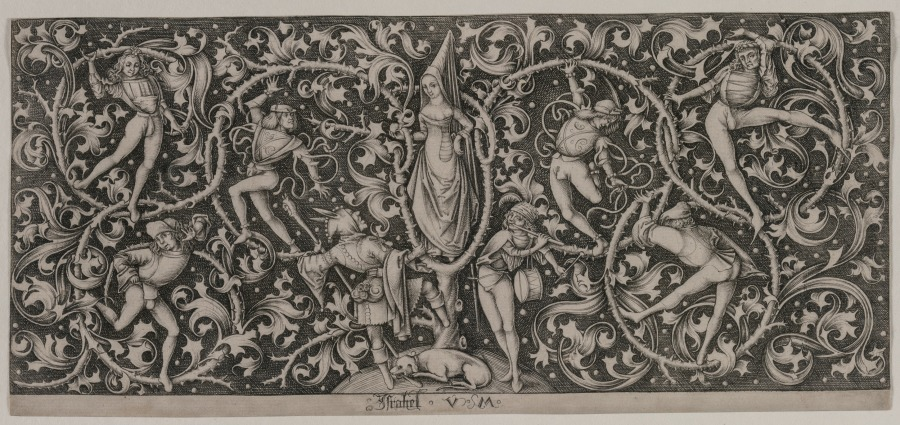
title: Ornament with Dance of the Lovers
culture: Germany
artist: Israhel van Meckenem (German, c. 1440–1503)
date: c. 1490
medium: engraving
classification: Print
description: In this image, the competitive nature of love and sexual desire plays out on treacherously thorned vines that block the young suitors from their ultimate prize, the elegant lady in the center. Given the presence of two musicians, the male suitors may be performing a type of folk dance, known as a Morris dance, which was popular in courtly circles at the time, and which relates, as well, to courtly love poetry performed by troubadours (lyrical poets of the Middle Ages).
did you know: Ornament prints such as this were often used by other artists and craftsmen as source material for motifs on decorative arts or furniture.